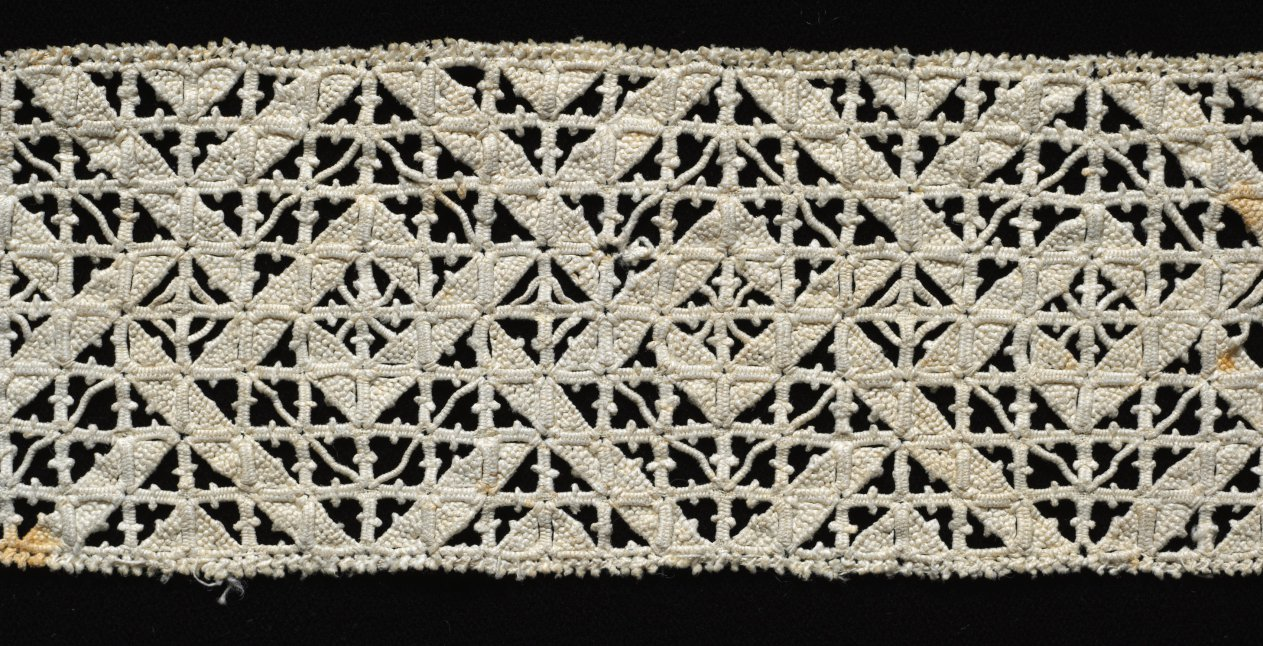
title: Lace Fragment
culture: Italy, Venice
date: 1500s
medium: Linen: needle lace, reticella insertion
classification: Lace